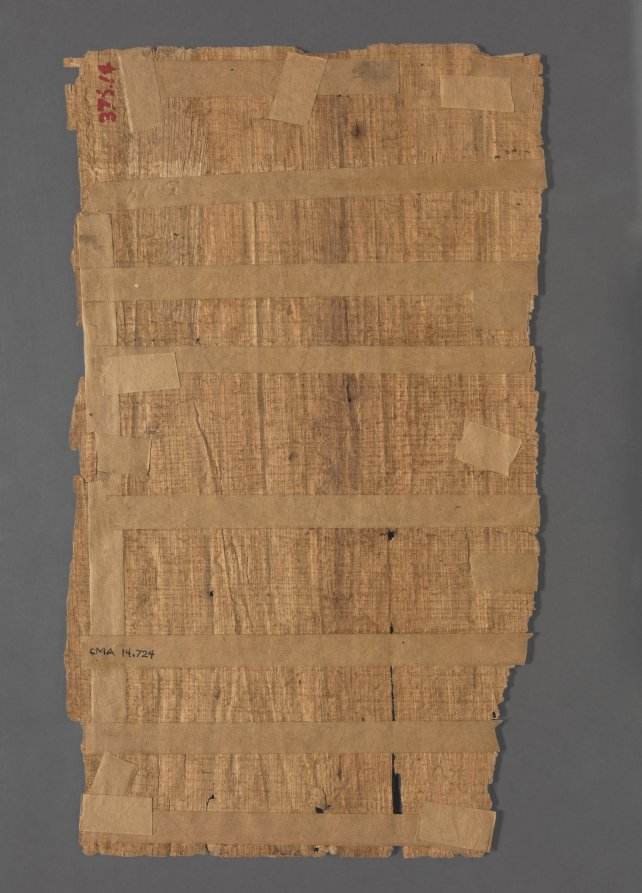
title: Vignette of the Book of the Dead of Bakenmut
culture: Egypt, Third Intermediate (1069–715 BCE), Dynasties 21–22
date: 1000–900 BCE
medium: papyrus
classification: Funerary Equipment